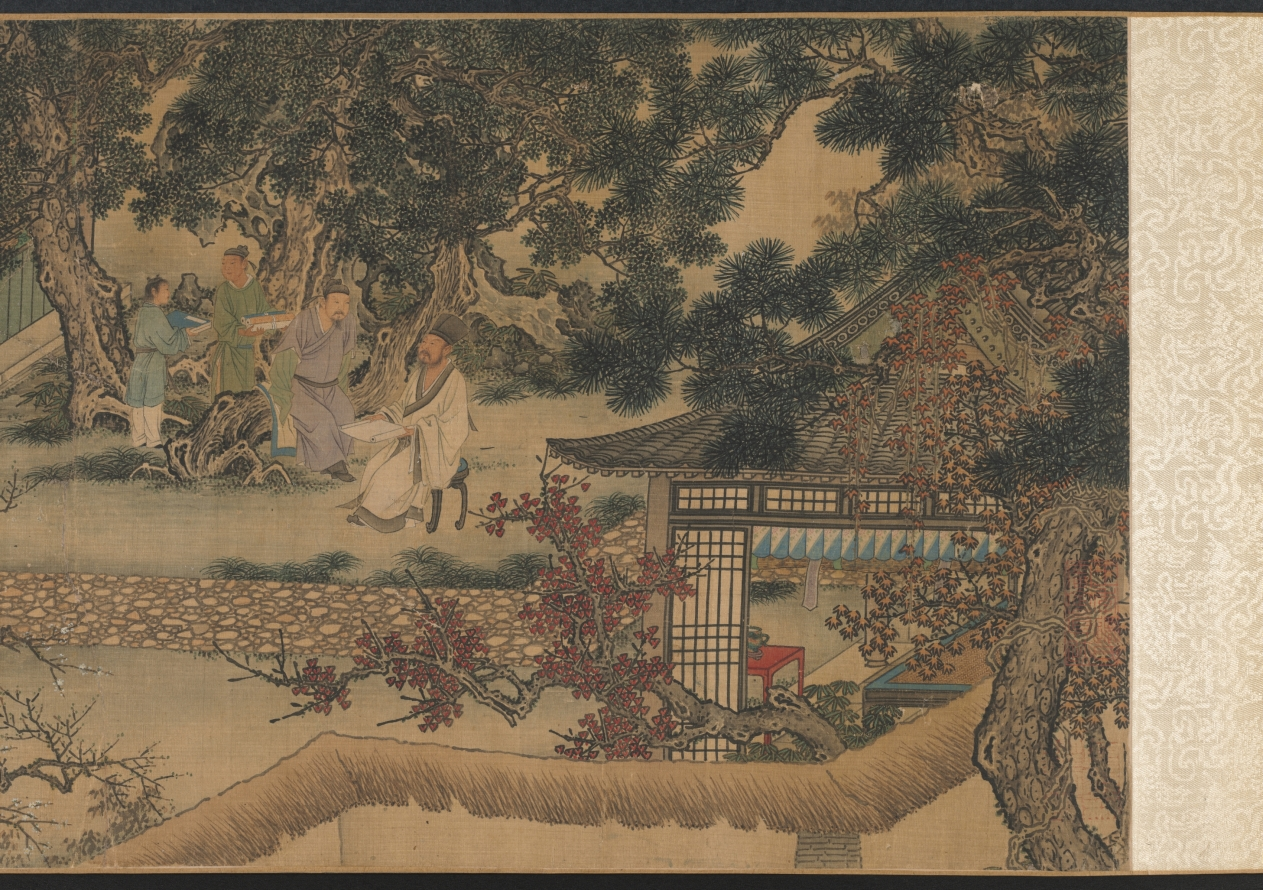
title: The Nine Elders of the Mountain of Fragrance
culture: China, Ming dynasty (1368–1644)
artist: attributed to Xie Huan (Chinese, c. 1370-c.1450)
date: 1426–52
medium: handscroll, ink and color on silk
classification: Painting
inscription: 4 seals: 2 of Xiang Yuanbian 項元汴 (1525–1590); 1 of the Qianlong Emperor (r. 1736-95); 1 of C. C. Wang 王季遷 (1907–2003)